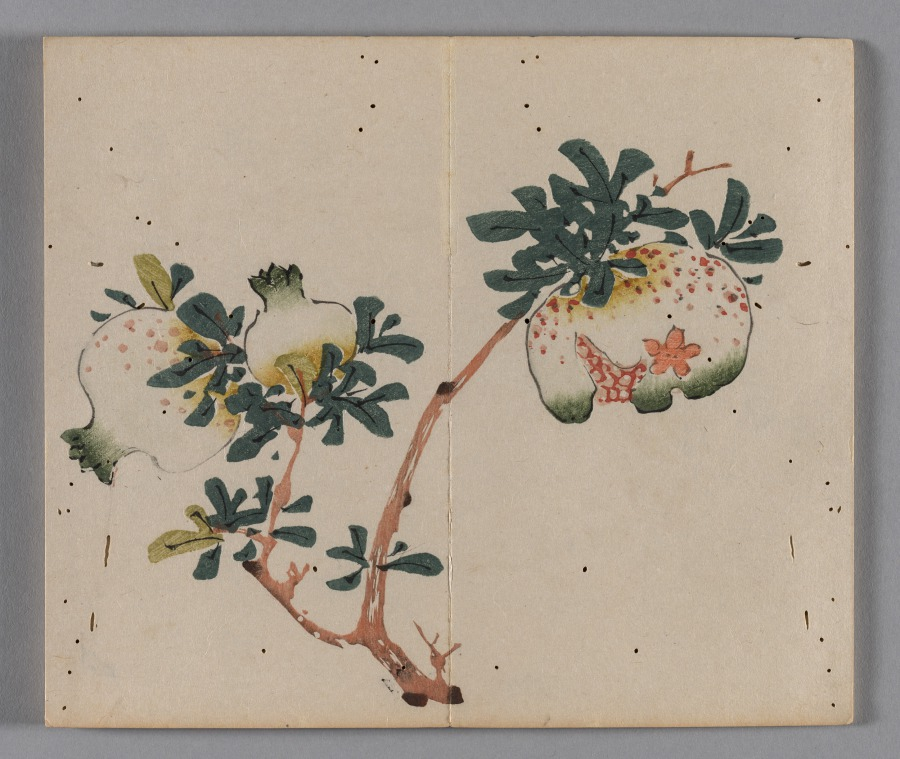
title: Ten Bamboo Studio Painting and Calligraphy Handbook (Shizhuzhai shuhua pu): Fruit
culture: China, Qing dynasty (1644-1911)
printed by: Hu Zhengyan (Chinese, c. 1584–1674)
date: 1633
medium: Woodblock-printed book; ink and colors on paper; first edition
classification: Print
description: Color printing reached a level of perfection in the early 1600s, as seen in this Ten Bamboo Studio Collection of Calligraphy and Painting and the Mustard Seed Garden Manual of Painting (printed 1679 and 1701). The painterly quality, precision in registering (aligning) the woodblocks, and harmonious colors made them the most successful color print editions in Chinese history. Both editions were printed and compiled in Nanjing, spread nationwide, and had a great impact on the arts in Japan and Korea.